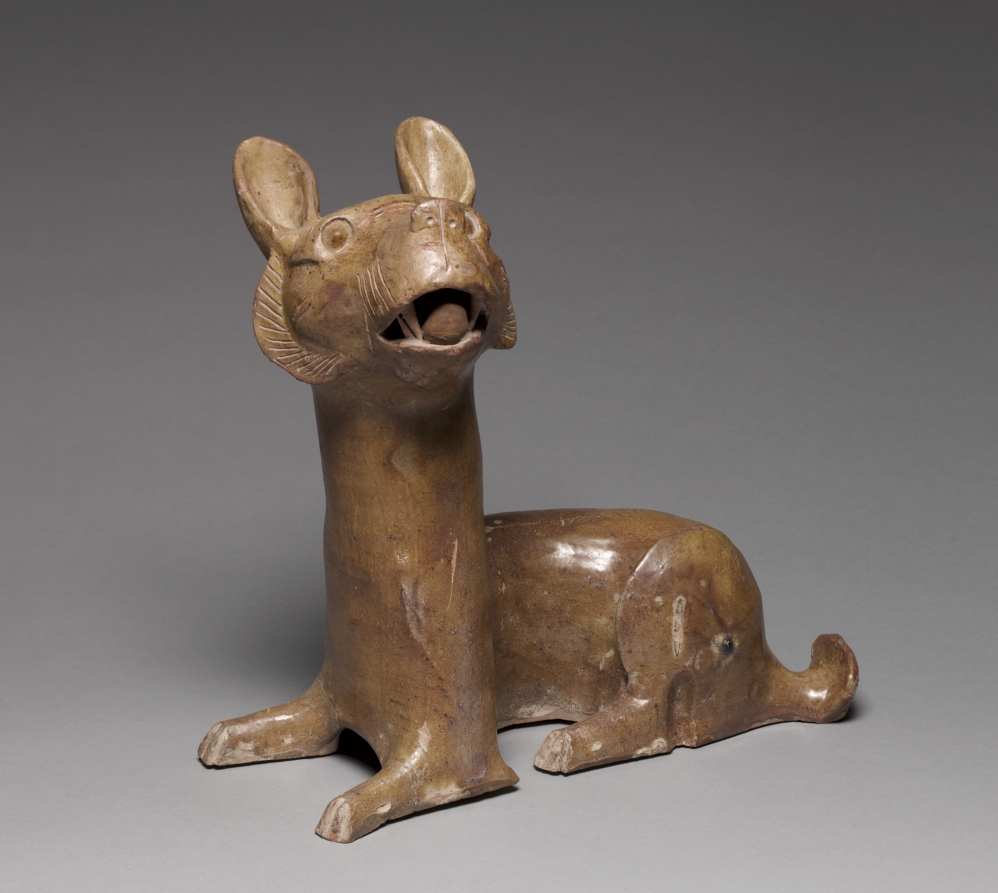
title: Dog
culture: China, Eastern Han dynasty (25–220 CE)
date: 25–220 CE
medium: earthenware with lead glaze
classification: Sculpture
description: Modeled with a lively naturalism and light humor, this dog reflects the worldly tastes of Han China. It differs from the solemn animal images on ritual bronze vessels, which served as the medium for communication with the supernatural realms. The Han people held beliefs in a worldly paradise and an otherworldly realm of eternal life and happiness.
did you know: The dog's muzzle, whiskers, and neck scruff were boldly incised into the earthenware form.